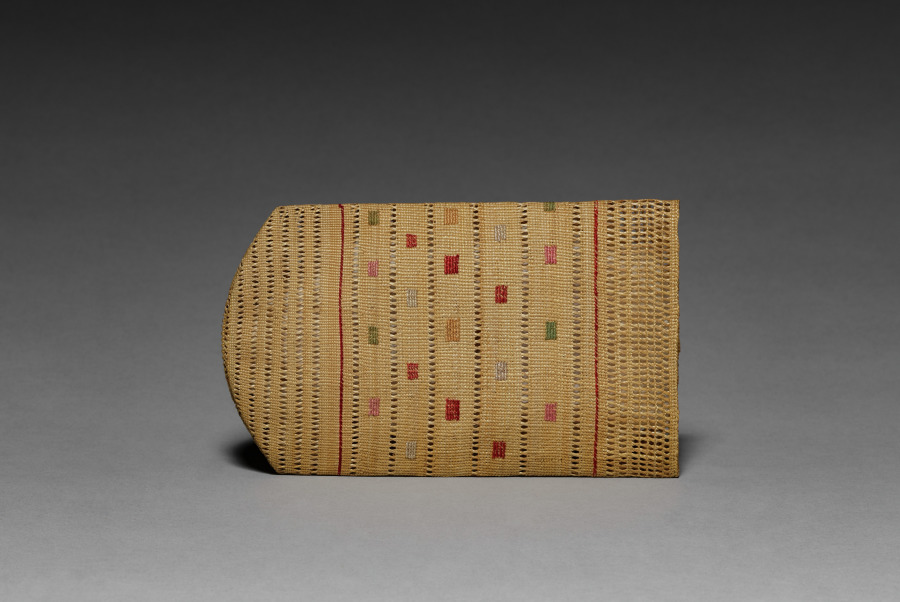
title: Cigarette or Needle Case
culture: Arctic, Aleut, Attu, Post-Contact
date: c 1875– 1917 (source unknown)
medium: plain twine, wild rye grass with crossed openwork, patterned twined start, intersecting layered spokes, and plaited finish; silk embroidery (catalogue card)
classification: Basketry